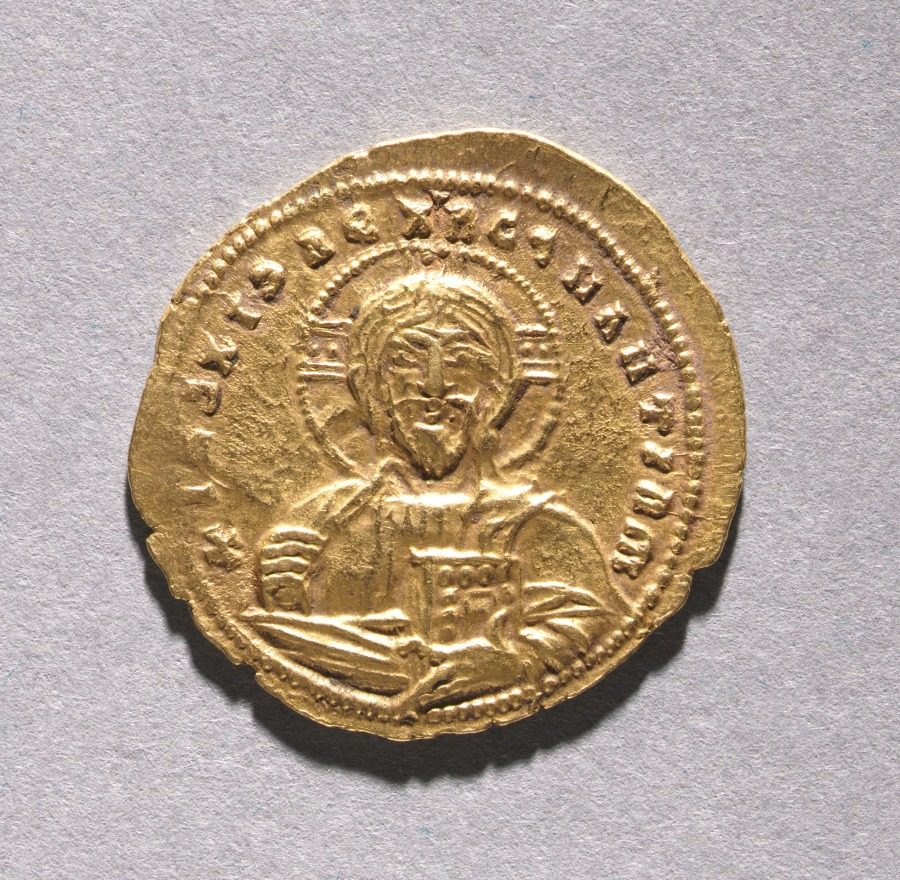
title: Nomisma with John I Zimisces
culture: Byzantium, Constantinople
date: 969–976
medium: gold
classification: Coins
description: The vast number of surviving Byzantine coins attests to the level of trade across the empire. Controlled and supervised by the emperor, the producers of coins took care to represent his authority and reflect his stature. Talented artists were recruited to engrave the dies (molds) used for the striking of coins. Emperors increasingly came to include their heirs and co-emperors on their coinage, as well as other family members or even earlier rulers. Coins were recognized, then as now, as small, portable works of art. With their inscriptions and images, Byzantine coins provide valuable documentation of historical events and a record of the physical appearance of the emperors. The coins shown here include the solidus, the basic gold coin of 24 karats; the tremissis, a gold coin of one-third the weight and value of the solidus; and the nomisma, which in the 10th century replaced the solidus as the standard gold coin.